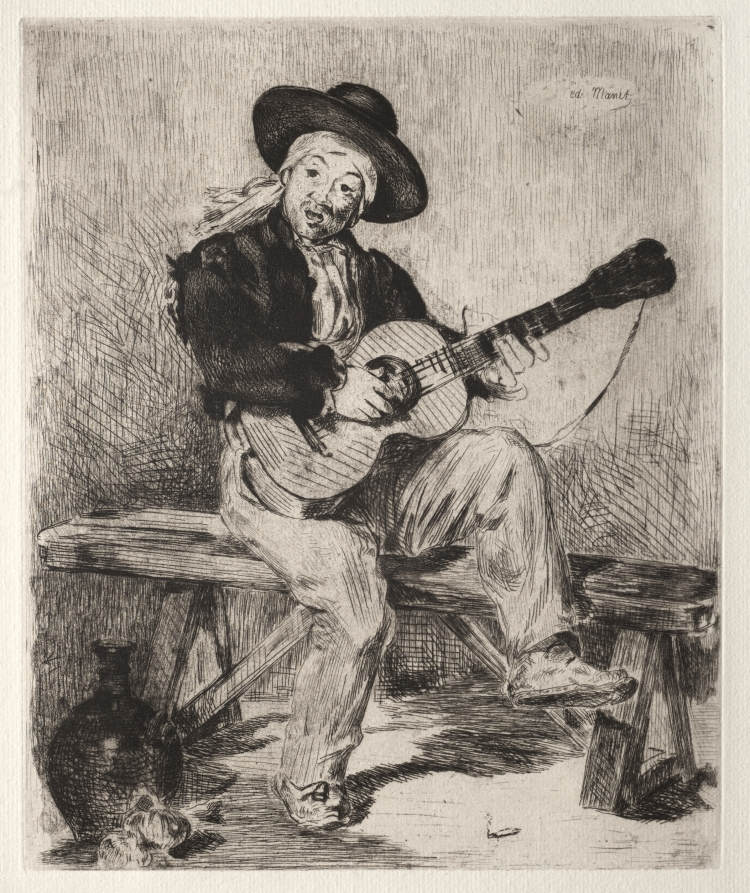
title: Le Guitarrero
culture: France, 19th century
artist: Édouard Manet (French, 1832–1883)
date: 1861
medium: etching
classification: Print